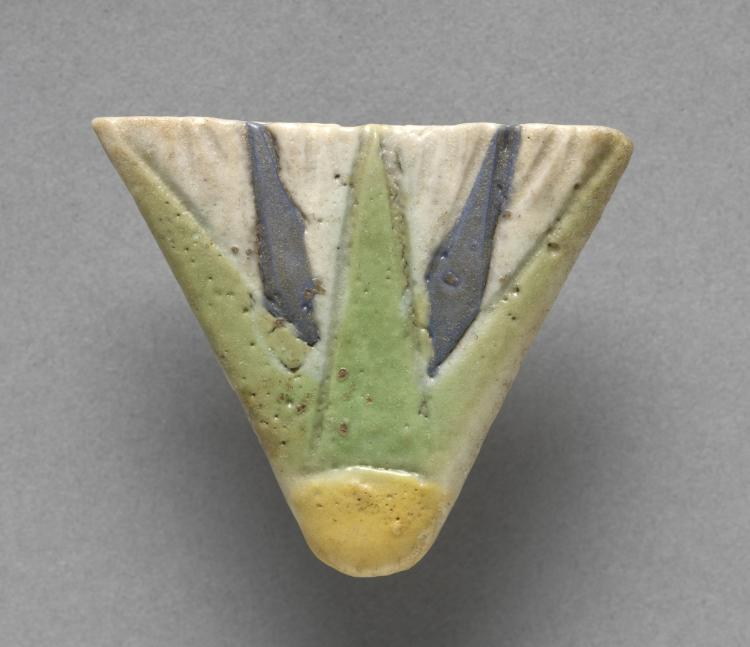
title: Lotus Blossom Necklace Terminal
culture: Egypt, New Kingdom (1540–1069 BCE), Dynasty 18, reign of Amenhotep III (1390–1352 BCE)–reign of Akhenaten (1351–1334 BCE)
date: c. 1391–1337 BCE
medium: polychrome faience with inlaid and painted decoration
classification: Jewelry